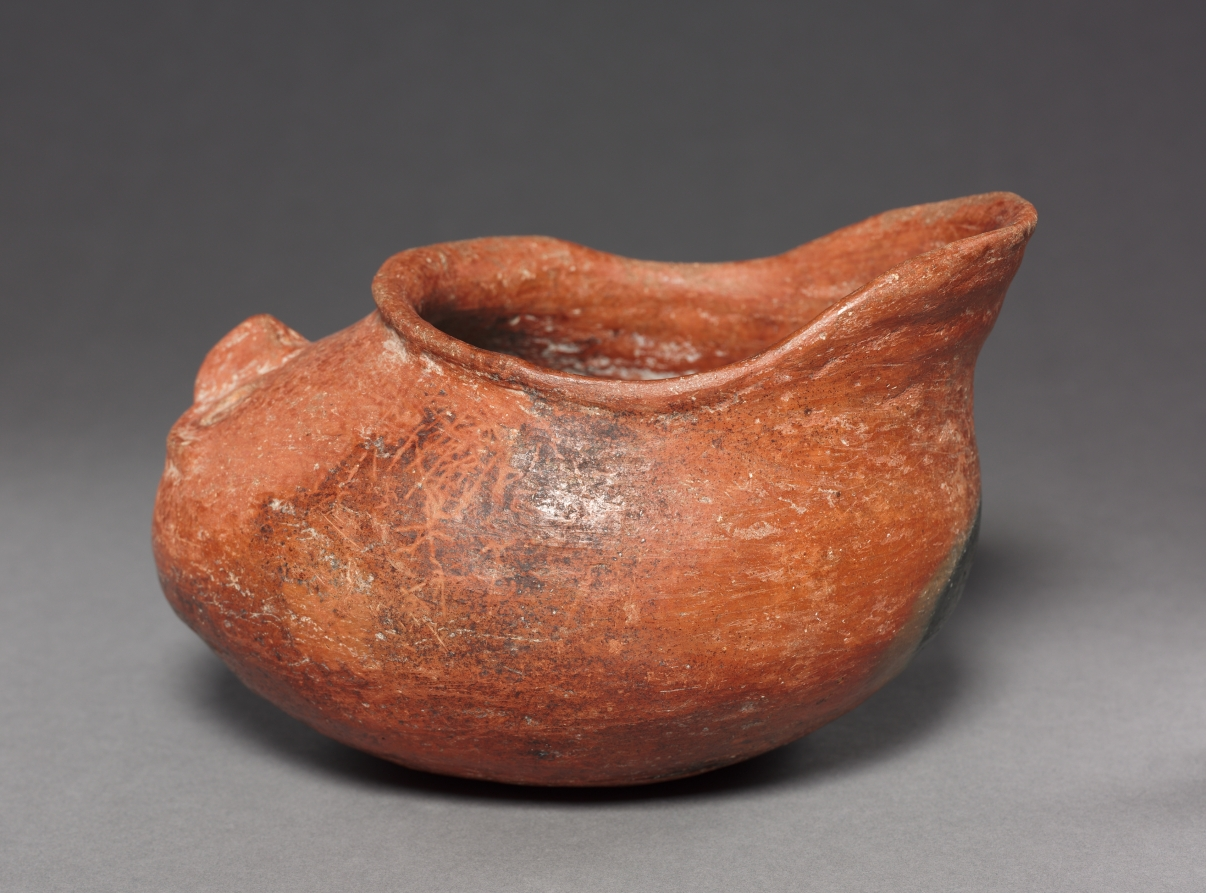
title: Head Effigy Bowl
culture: Mexico, Region of Tilantongo, District of Tlaxiaco, Nayarit style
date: 100 BCE–300 CE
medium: pottery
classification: Ceramic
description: After about 200 BC, West Mexican chieftains gained in authority, their new status reflected in shaft tombs that shelter not only their remains but also lavish offerings, including sculptural ceramics. Many of the ceramics may refer to the crucial activities of a chief’s life, such as marriage, feasting, and war. The meaning of this unusual bowl—a head whose gaping mouth serves as the aperture—is unknown.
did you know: Ancient Nayarit art is celebrated for its timeless, often lighthearted expressions of humanity.